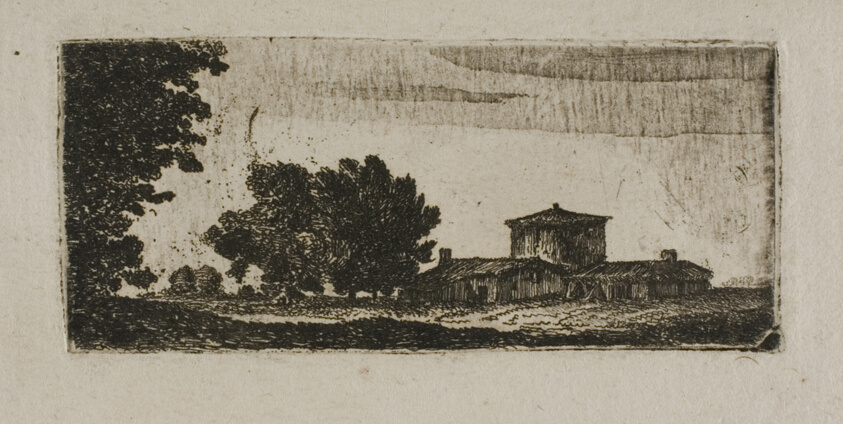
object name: Print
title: Trees and Buildings with Low Tower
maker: John Clerk of Eldin (Scottish, 1728-1812)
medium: Etching on paper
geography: Scotland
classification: etching; print; prints and drawing